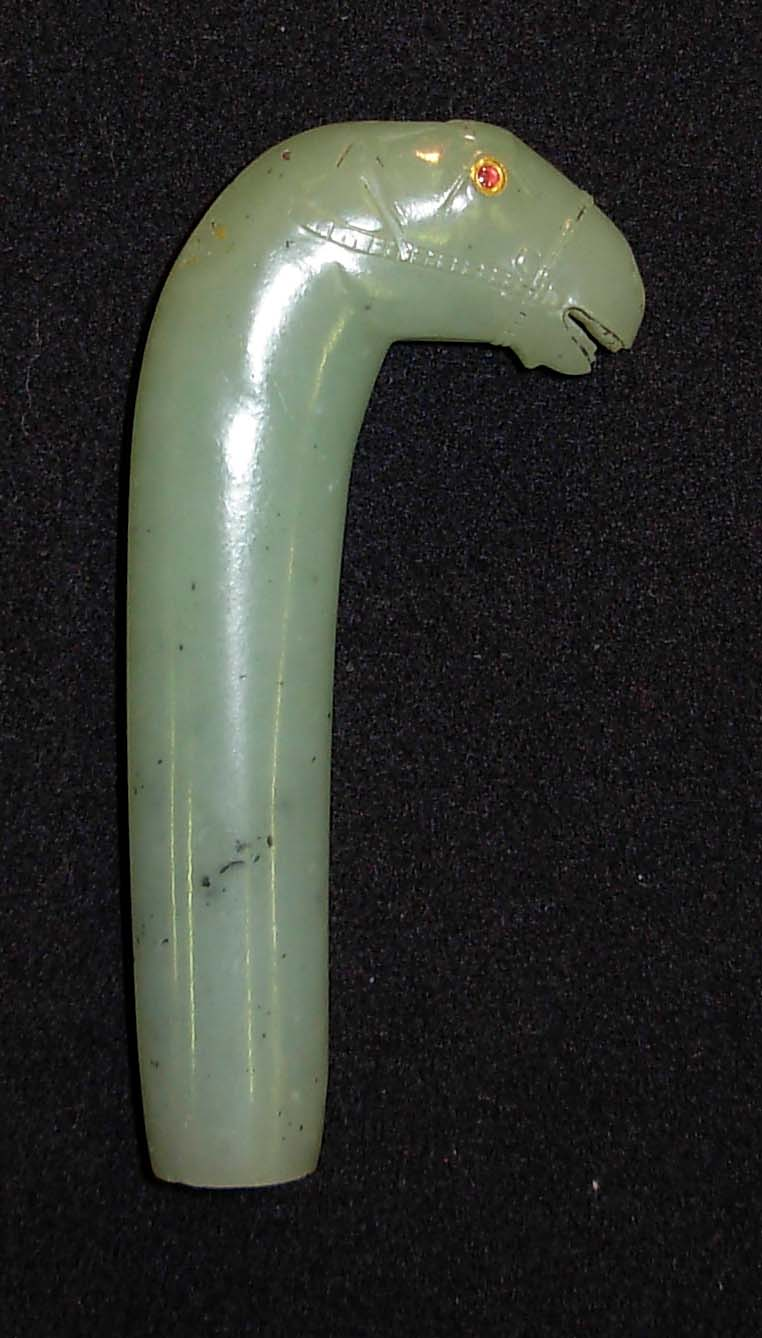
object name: Costume and Accessories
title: Knife Hilt with Horse-Head Pommel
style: South Asian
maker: India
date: 18th century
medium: Jade, gold, and rubies inset in the kundan technique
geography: India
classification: jade; asian art; costume